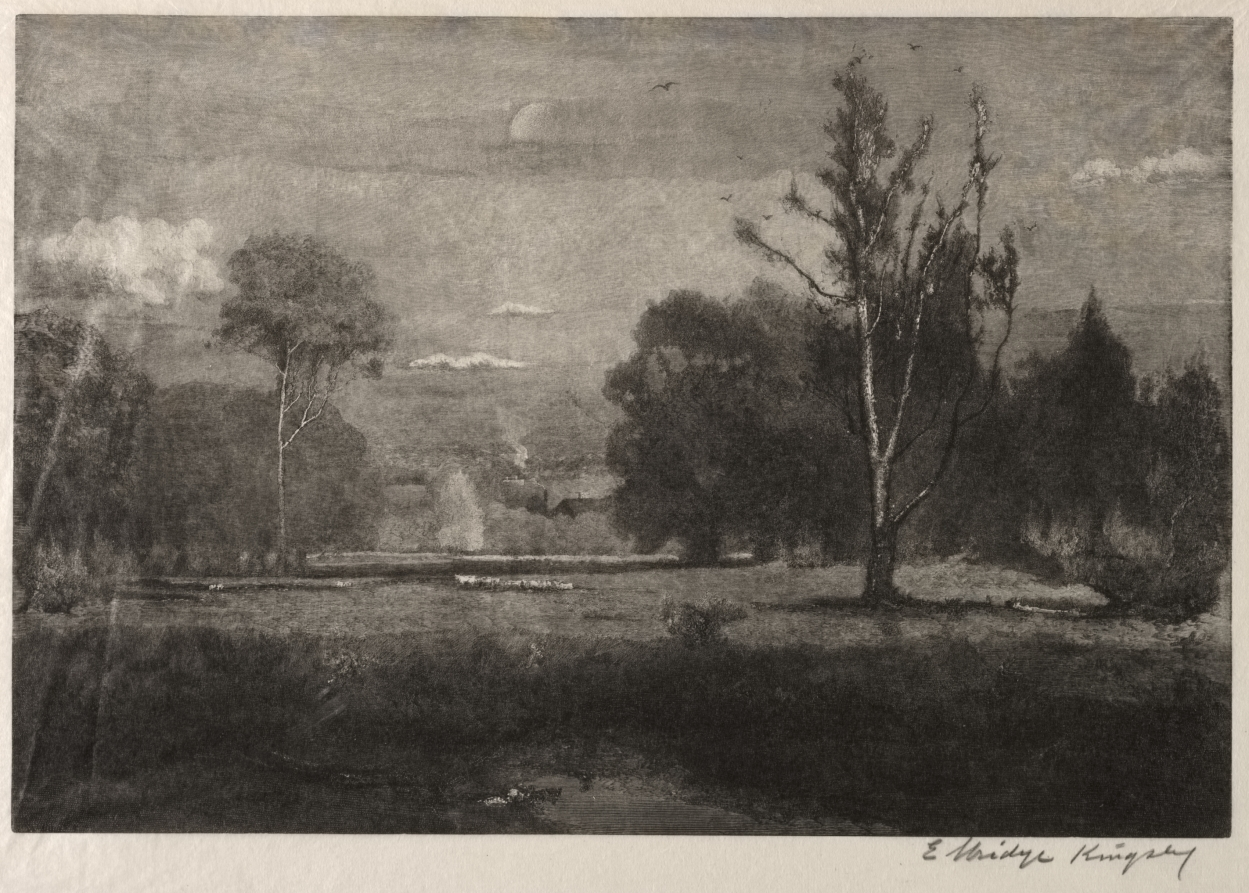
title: A Morning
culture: America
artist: Elbridge Kingsley (American, 1841–1915)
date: 1887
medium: wood engraving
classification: Print